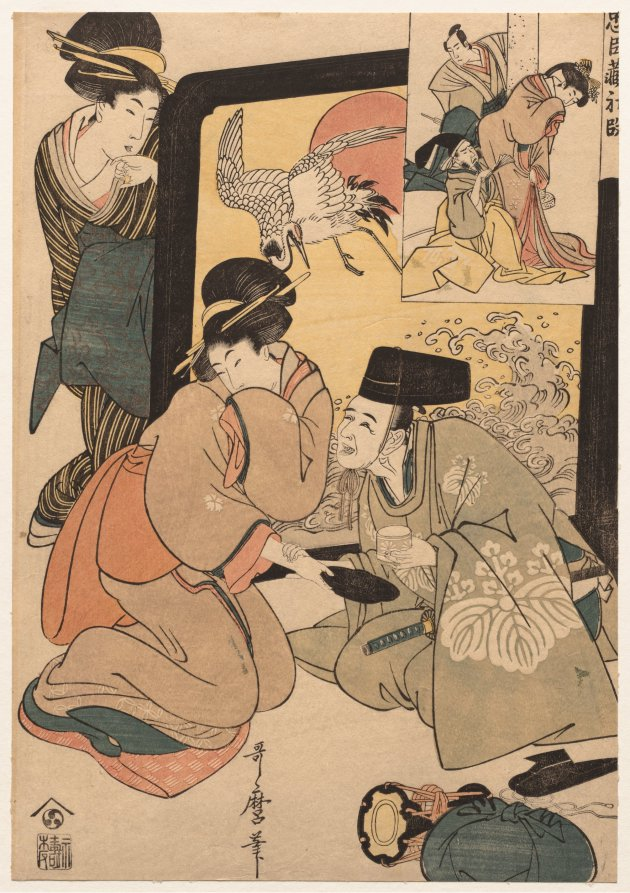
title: Chushingura: Act I of The Storehouse of Loyalty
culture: Japan, Edo period (1615–1868)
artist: Kitagawa Utamaro (Japanese, c. 1754–1806)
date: late 1790s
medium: color woodblock print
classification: Print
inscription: Artist's signature: Utamaro hitsu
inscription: Publisher: Nishimuraya Yohachi (Eiju han, emblem).